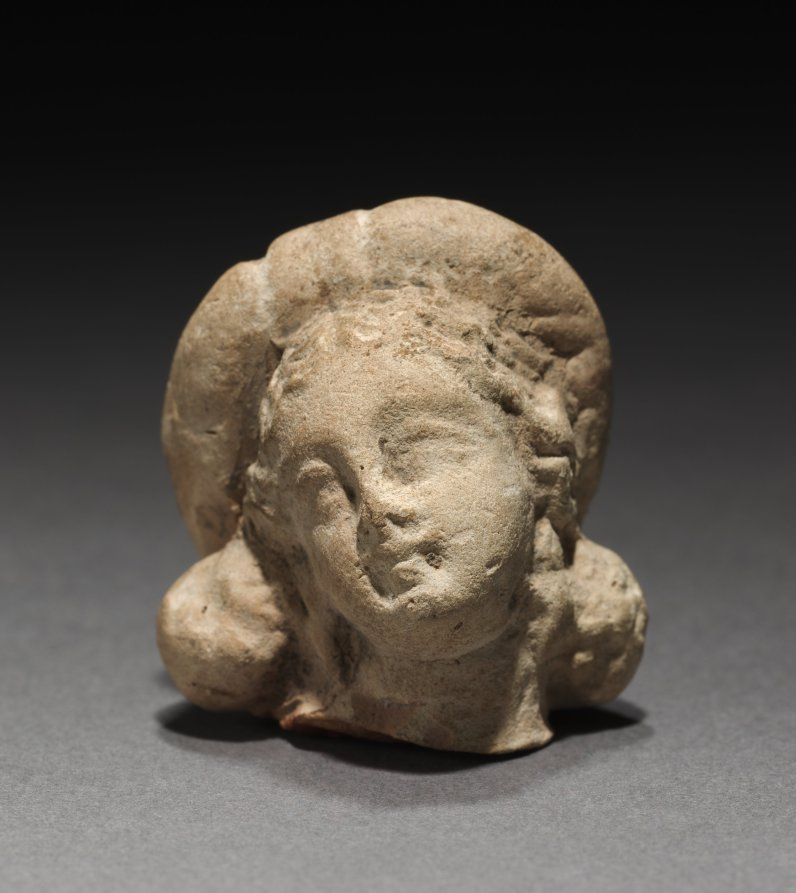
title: Head of a Goddess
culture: Parthian Empire (247 BCE–224 CE)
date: 1–200 CE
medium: terracotta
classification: Sculpture